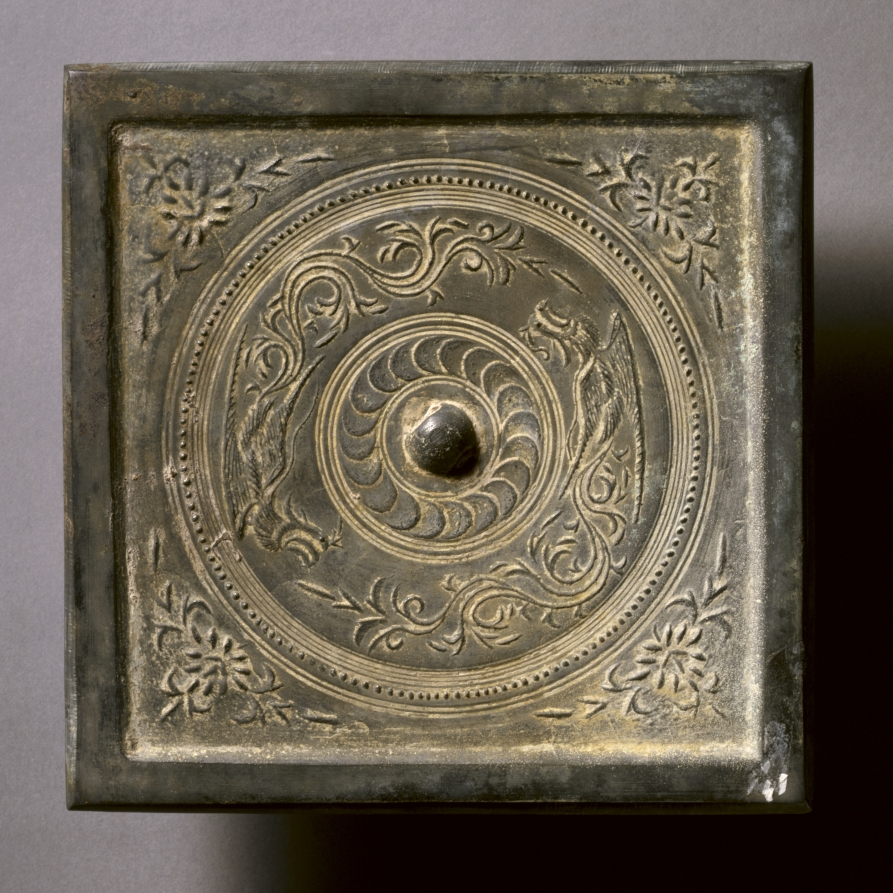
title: Square Mirror with Two Phoenixes and Floral Sprays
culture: China, Northern Song dynasty (960-1127)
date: 960–1127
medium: bronze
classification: Metalwork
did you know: The Chinese phoenix is known as Fenghuang, mythological birds in East Asian mythology that reign over all other birds.